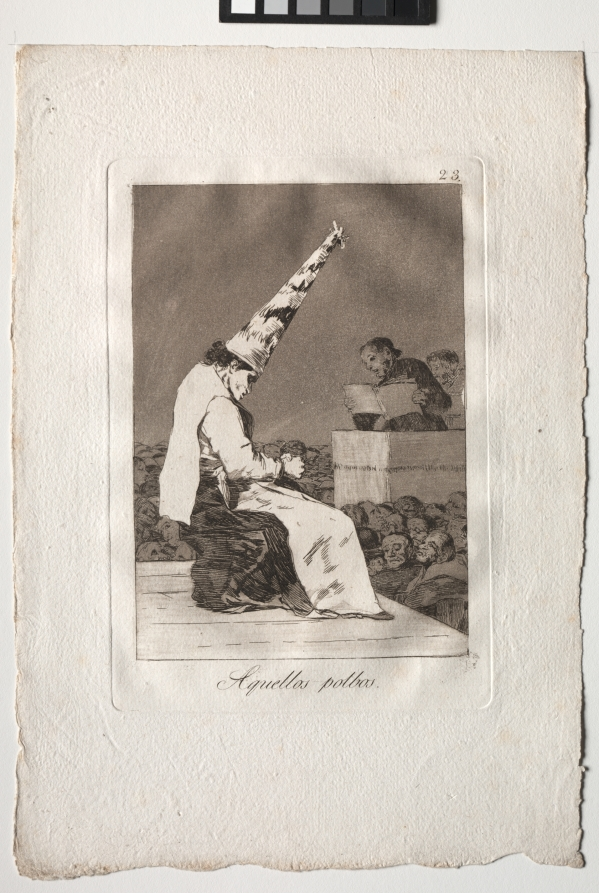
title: Those Specks of Dust, Plate 23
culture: Spain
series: Los Caprichos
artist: Francisco de Goya (Spanish, 1746–1828)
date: 1799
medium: etching and aquatint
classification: Print